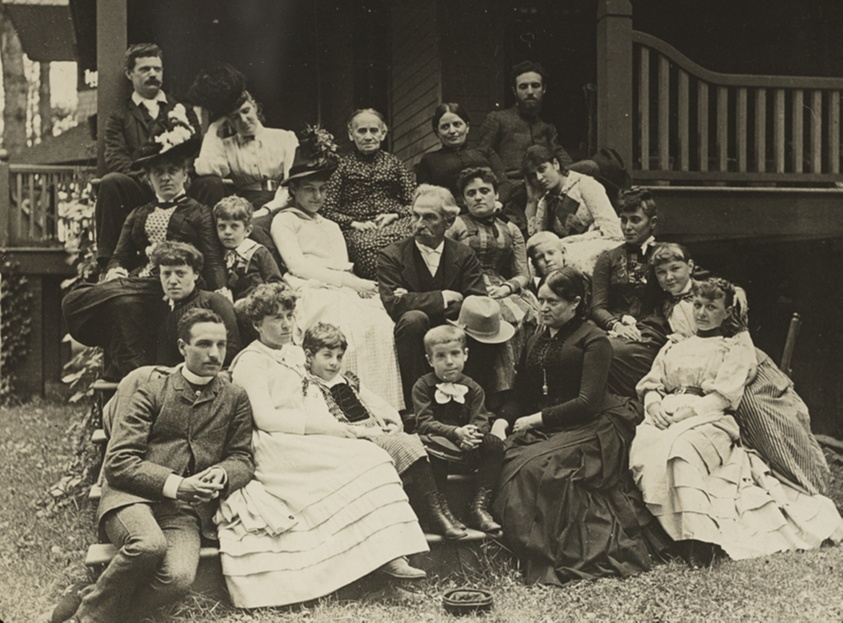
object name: Photograph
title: Stieglitz Family at Oaklawn, Lake George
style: 19th century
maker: Alfred Stieglitz (American, 1864–1946)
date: 1888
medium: Lantern slide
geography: United States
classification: lantern slide (glass); negative/transparency; photography; photograph